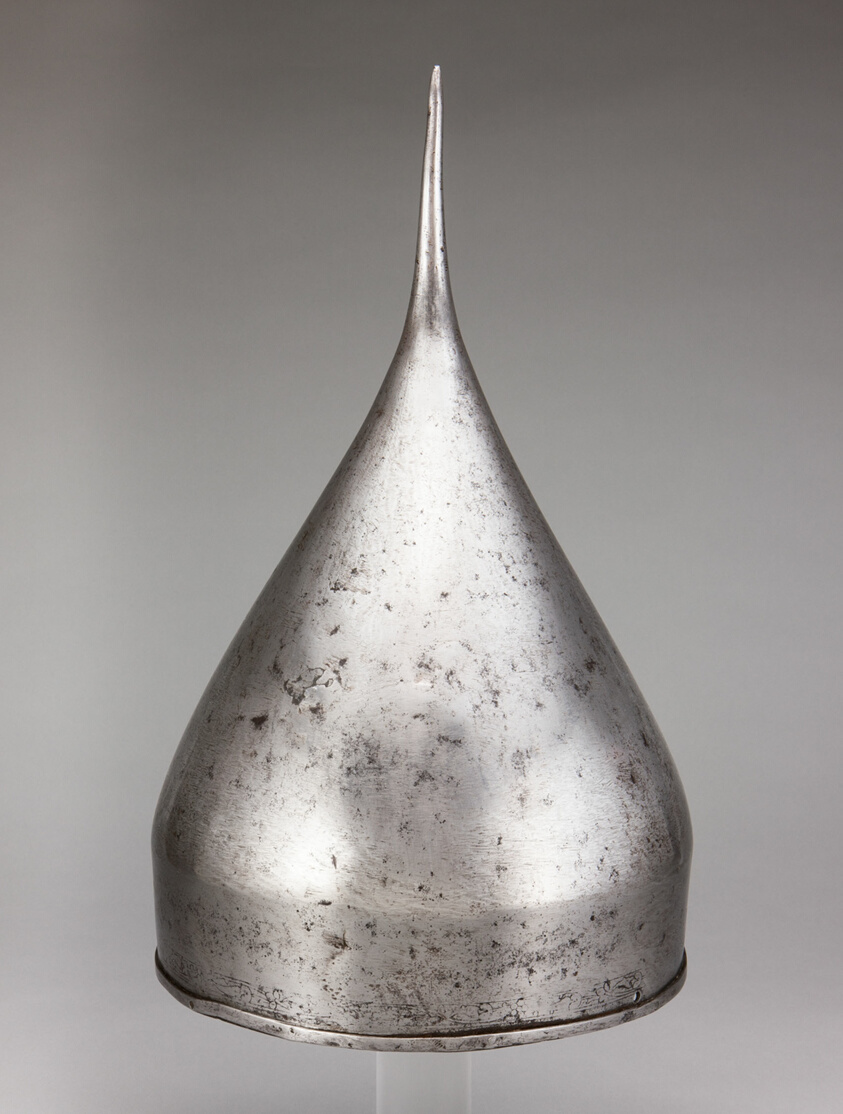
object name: Armor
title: Shishak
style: Islamic, caucasian, turkish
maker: Possibly Causasus or Turkey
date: 16th century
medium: Steel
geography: Caucasus Mountains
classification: helmet; islamic; armor; arms and armor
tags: islamic, Turkey